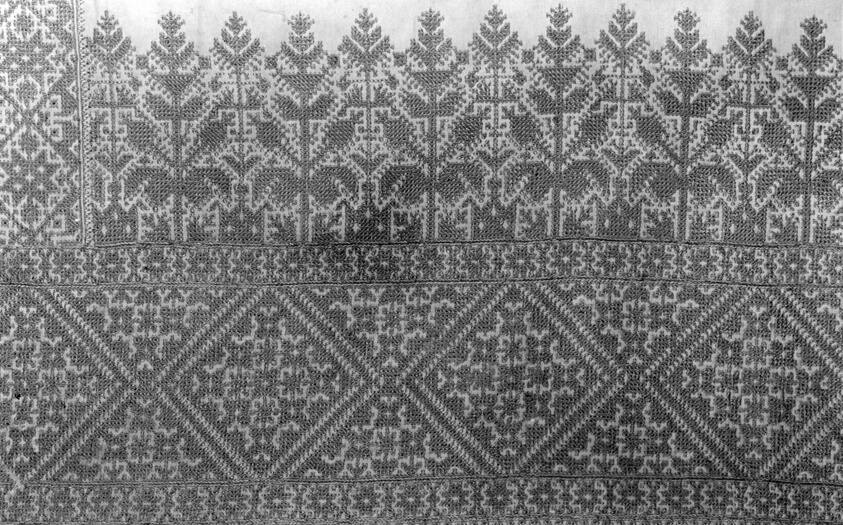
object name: Textile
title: Fragment (From a pillowcase)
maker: Morocco, Fès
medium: Silk embroidery on plain cream-colored cotton cloth. Stitch: Holbein stitch over four threads, stem stitch, satin stitch, star stitch; buttonhole stitched edges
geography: Morocco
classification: textile; weaving; needlework (visual works)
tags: morocco